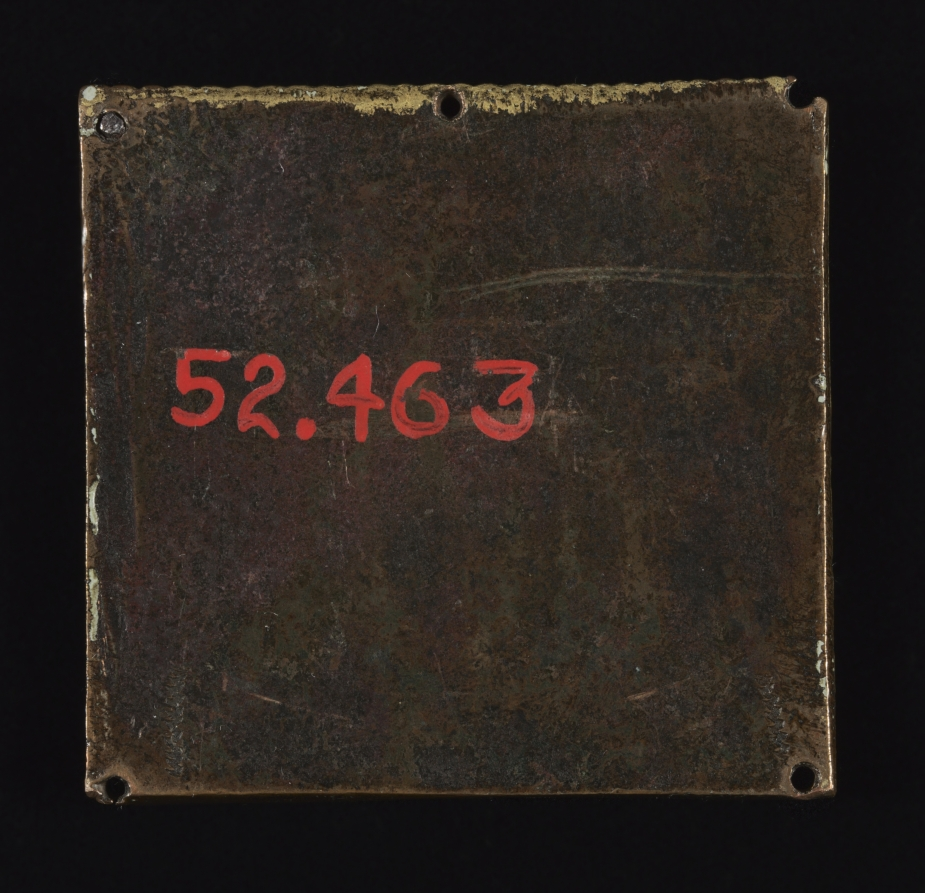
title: Plaque: Thomas and Matthew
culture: Mosan, Valley of the Meuse, Romanesque period, 12th century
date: c. 1160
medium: gilded copper, champlevé enamel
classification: Enamel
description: It is likely this pair of enamel plaques depicting the apostles Simon with Thaddeus and Thomas with Matthew once formed part of the decoration of a portable altar, a reliquary triptych, or some other kind of liturgical object.